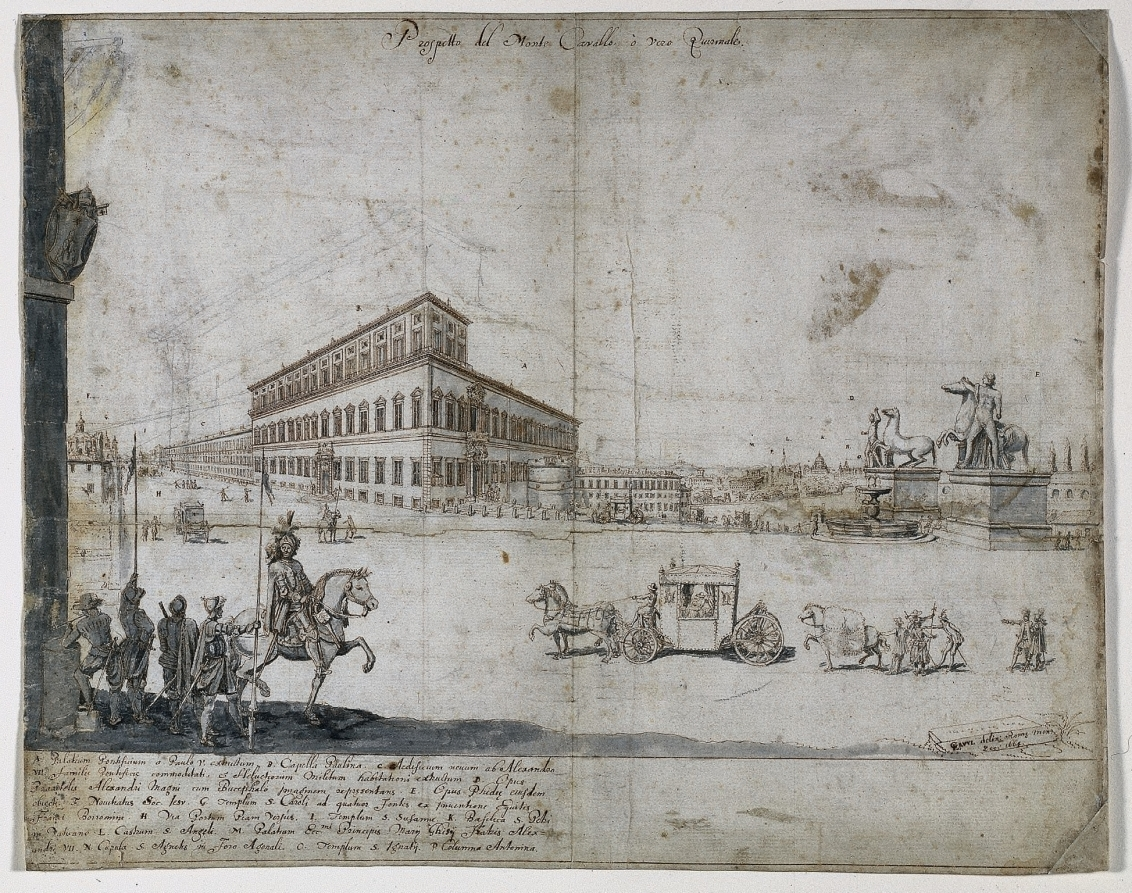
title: Eighteen Views of Rome: The Quirinale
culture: Flanders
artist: Lievin Cruyl (Flemish, c. 1640-c. 1720)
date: 1664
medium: pen and brown ink and brush and gray wash over graphite; framing lines in brown ink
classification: Drawing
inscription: signed, lower right, in brown ink: [artist monogram: LC] RVYL delin: Romæ men: / Dec: 1664 ; by artist, upper center, in brown ink: Prospetto del Monte Cavallo, ò vero Quirinale. ; by artist, throughout composition, in brown ink: [the letters A-P] ; by artist, lower left, in brown ink: A. Palatium Pontificum a Paulo V. extructum. B. Capella Paulina. C. Aedificum novum ab Alexandro / VII. familiæ Pontificiæ commoditati, et Helvetiorum Militum habitationi extructum. D. Opus / Praxitelis Alexandri Magni cum Bucephalo jmaginem repraesentans. E. Opus Phidiae eiusdem / obiecti. F. Novitiatus Soc. Iesu. G. Templum S. Caroli ad quatuor Fontes ex jnventione Equites / Franci Borromini. H. Via Portum Piam Versus. I. Templum S. Susannæ. K. Basilica S, Petri / in Vaticano. L. Castrum S. Angeli. M. Palatium Ecc.mi [mi superscript] Principis Marij Ghisij Fratris Alex= / andri VII. N. Cupola S. Agnetis in Foro Agonali. O. Templum S, Ignatij. P. Columna Antonina. ; VERSO, upper left, in ink?: [illegible, masked] ; ON STRIPS OF PAPER MOUNTED TO VERSO, lower right, in graphite: A 20972 [sideways] ; lower right, in graphite: [E. ?] #6